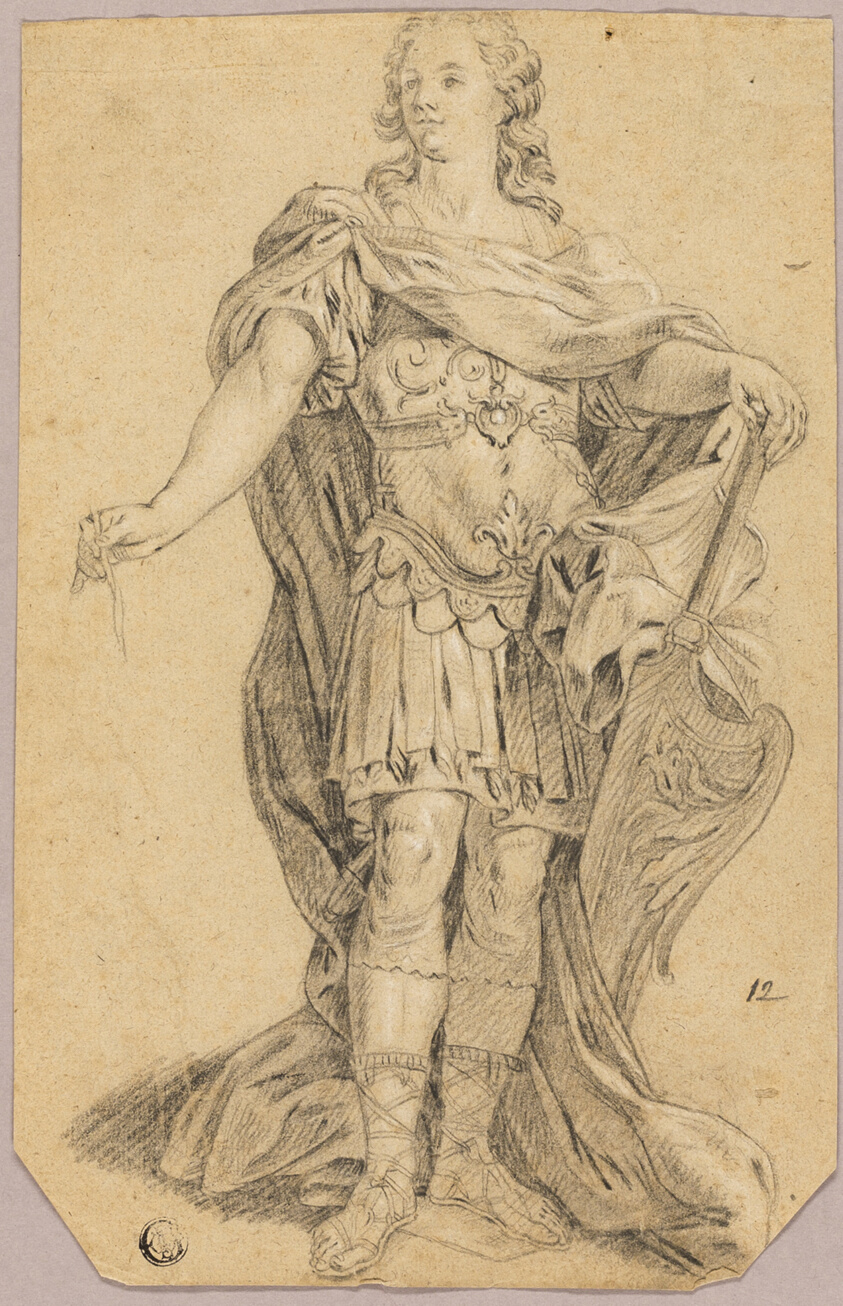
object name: Drawing and Watercolor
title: Statue of Louis XIV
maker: Possibly after Jean-Baptiste Lemoyne, II (French, 1704-1778); or possibly Hyacinthe Rigaud (French, 1659-1743)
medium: Black chalk heightened with white chalk, on dark tan laid paper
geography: France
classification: chalk; paper; drawings (visual works); prints and drawing